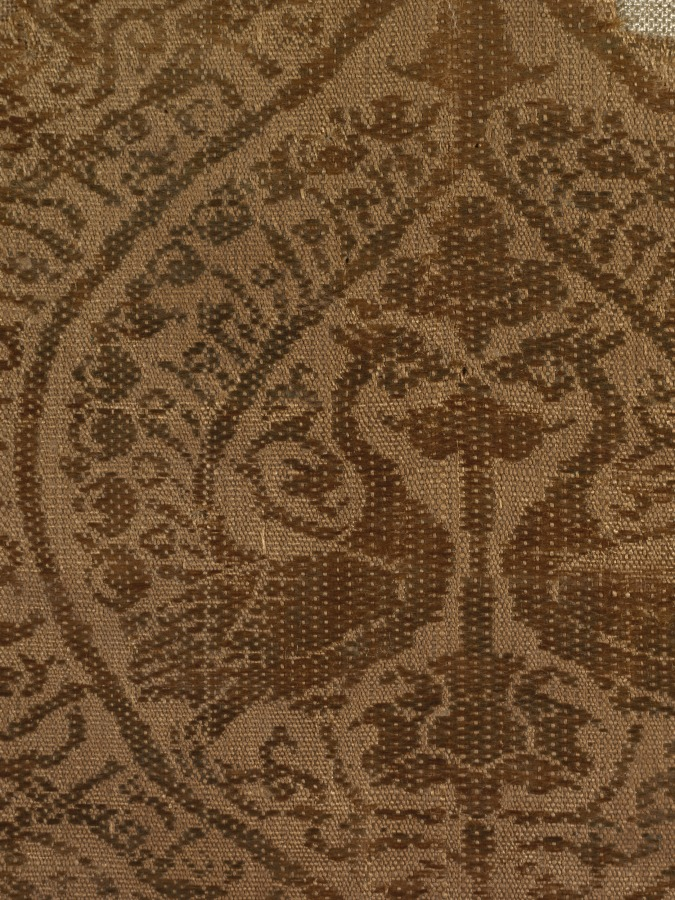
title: Fragment with peacocks in ogival pattern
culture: Iran or Iraq, possibly Rayy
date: 1004–1260 (radiocarbon date, 95% probability)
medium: Silk: plain weave with supplementary weft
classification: Textile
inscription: Pseudo-Arabic decorative inscriptions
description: Neither the design nor the technique of this silk provides clues to whether it was woven in Iran or Syria. As Iran and Iraq fell to the Mongol armies during the second quarter of the 1200s, many artisans fled to Syria, taking with them the techniques and patterns with which they were familiar. The inscriptions are purely decorative.